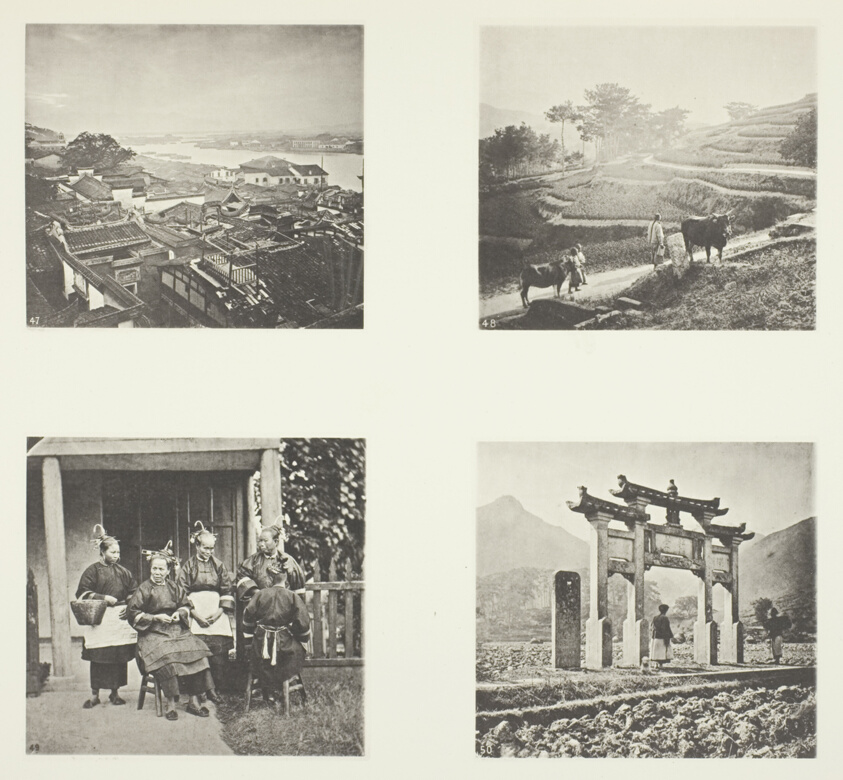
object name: Photograph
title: Part of Foochow Foreign Settlement; Terracing Hills; Foochow Field Women; A Memorial Arch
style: 19th century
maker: John Thomson (Scottish, 1837–1921)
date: c. 1868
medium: Collotype, pl. XX from the album "Illustrations of China and its People, Volume II" (1873)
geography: Scotland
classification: photography; photograph